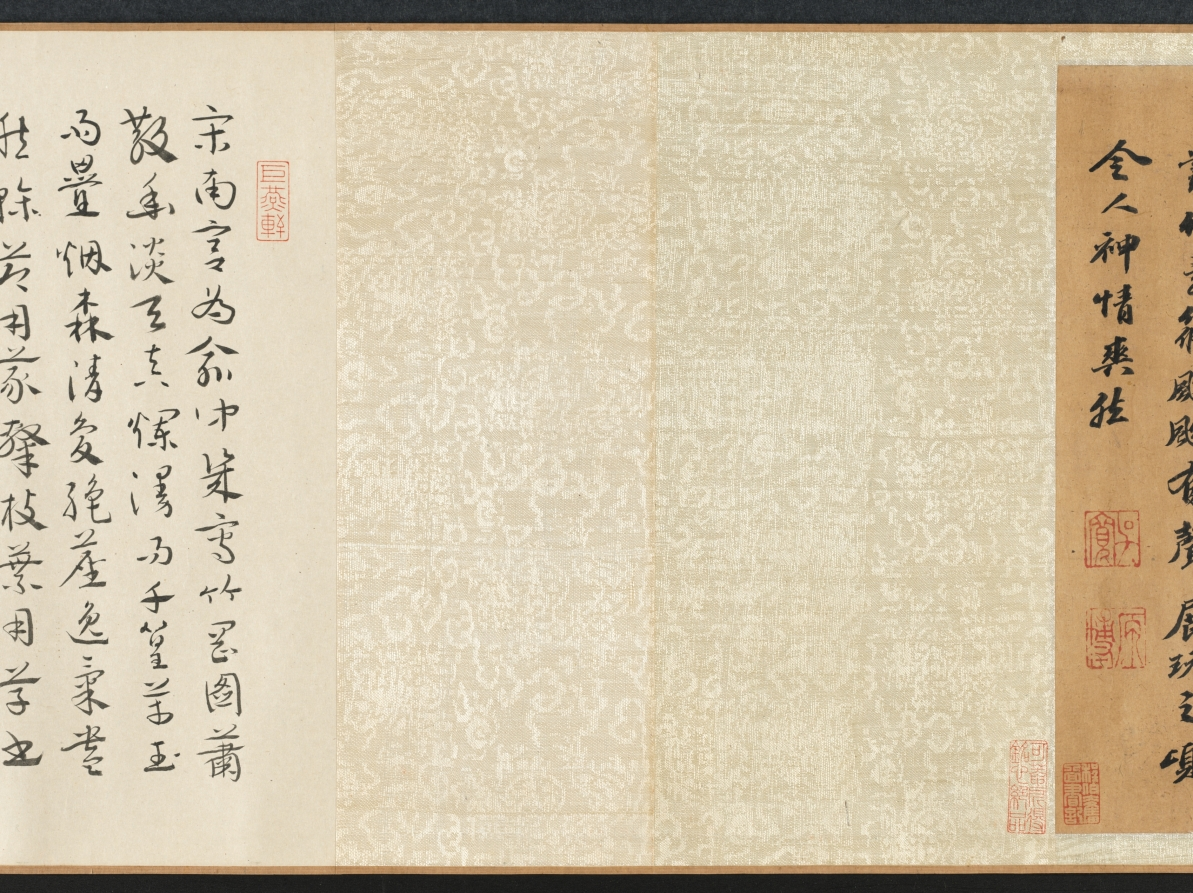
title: Landscape with Bamboo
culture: China, Yuan dynasty (1271-1368)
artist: Song Ke (Chinese, 1327–1387)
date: 1300s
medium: Handscroll; ink on paper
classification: Painting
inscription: 東吳宋克戲為仲幾畏友圖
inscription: 2 colophons and 14 additional seals: 1 seal of Yü Chung-chi (14th c.); 1 seal of Wu Ch'eng (1469 jinshi); 1 colophon and 2 seals of Wu K'uan (1435–1504); 1 colophon and 9 seals of Cheng Qi (1911–1988); 1 seal unidentified.